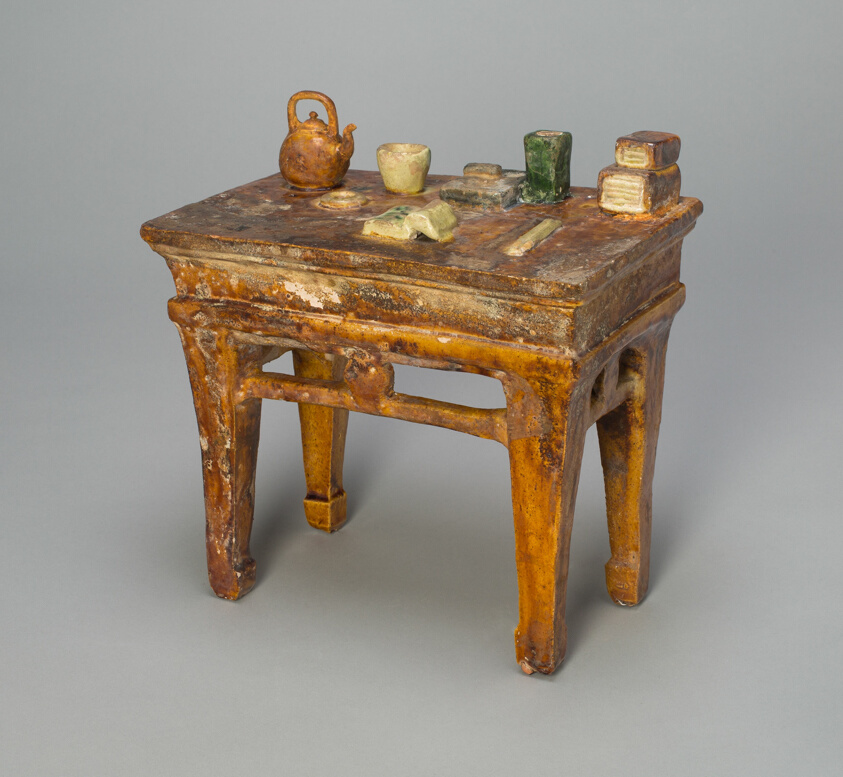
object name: Sculpture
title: Miniature Table with Scholarly Implements (Mingqi)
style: Chinese (culture or style)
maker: China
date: Ming dynasty (1368–1644)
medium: Earthenware with green and yellow-brown glazes and underglaze molded decoration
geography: China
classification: ceramics; miniature; asian art; sculpture